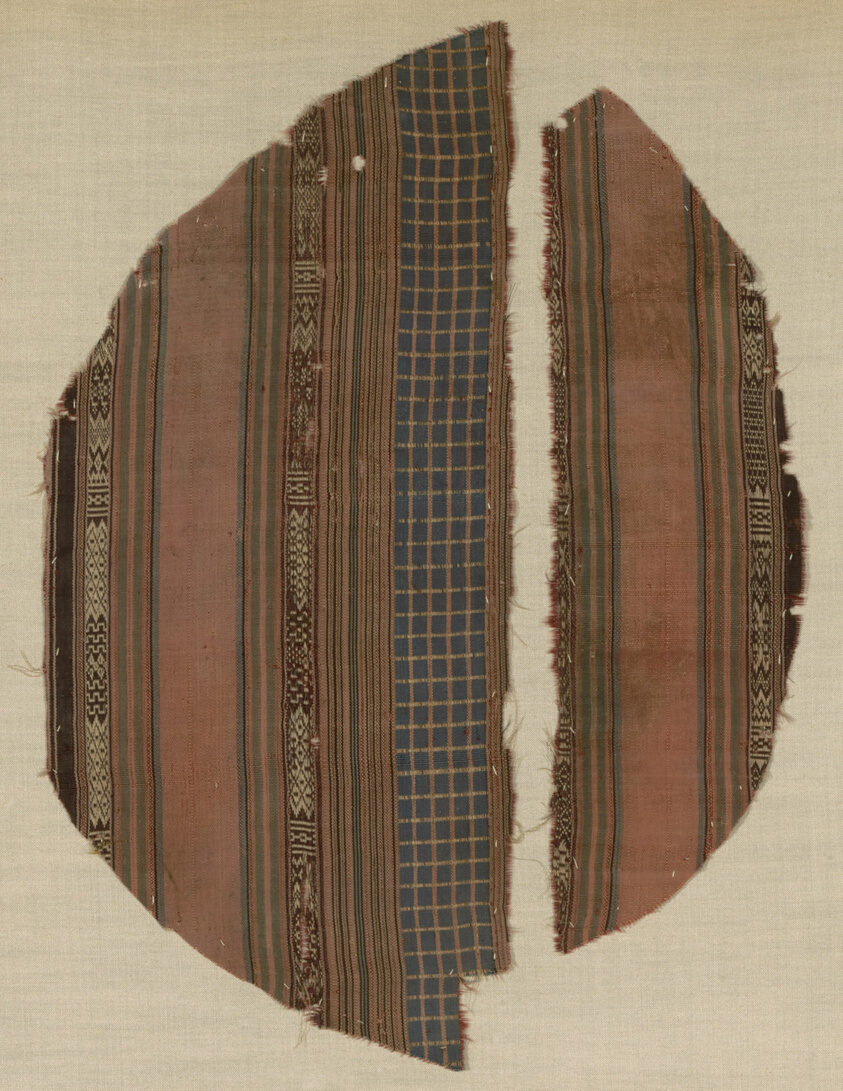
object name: Textile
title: Fragment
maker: Coptic (Egypt)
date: Arab period (641–969)/Fatimid period (969–1171)/Ayyubid period (1171–1250)/ Mamluk period (1250–1517), 9th/13th century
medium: Plain compound cloth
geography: Egypt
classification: textile; weaving